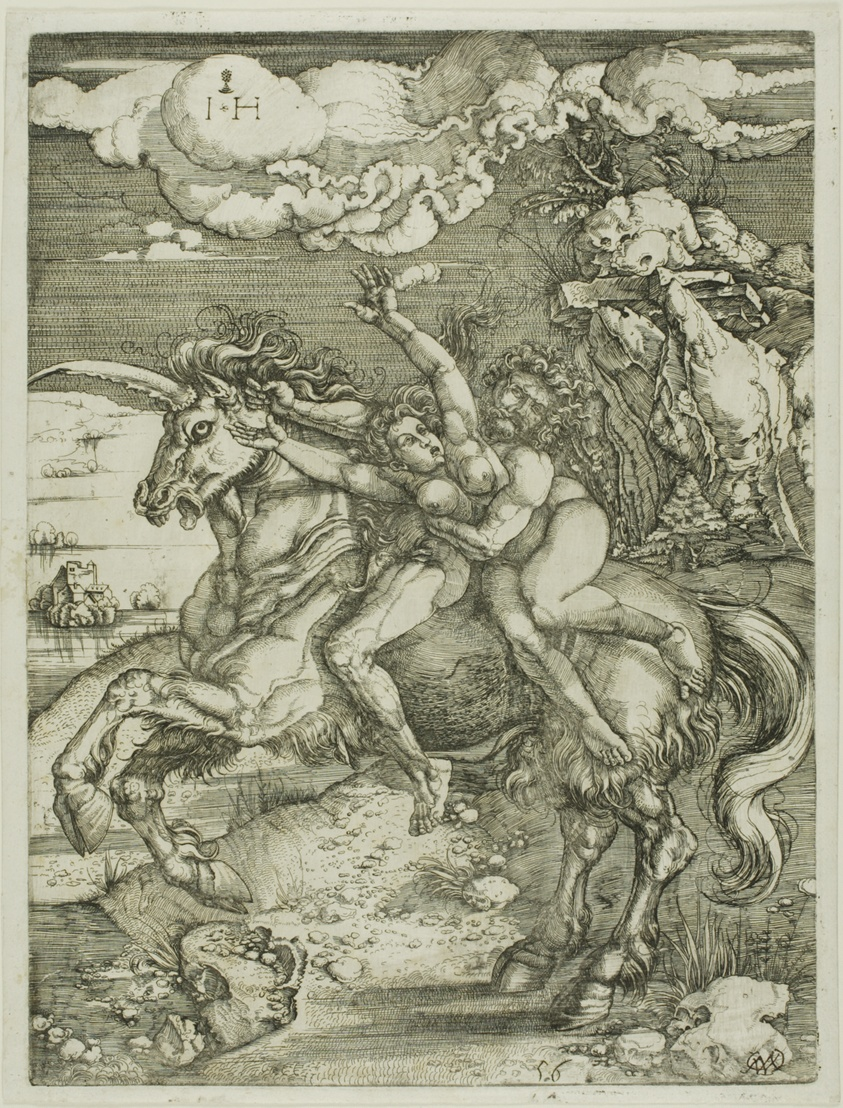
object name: Print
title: Abduction of Proserpine on a Unicorn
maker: Hieronymous Hopfer (German active 1520-1550); after Albrecht Dürer (German 1471-1528)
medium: Etching on white laid paper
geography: Germany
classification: etching; print; prints and drawing